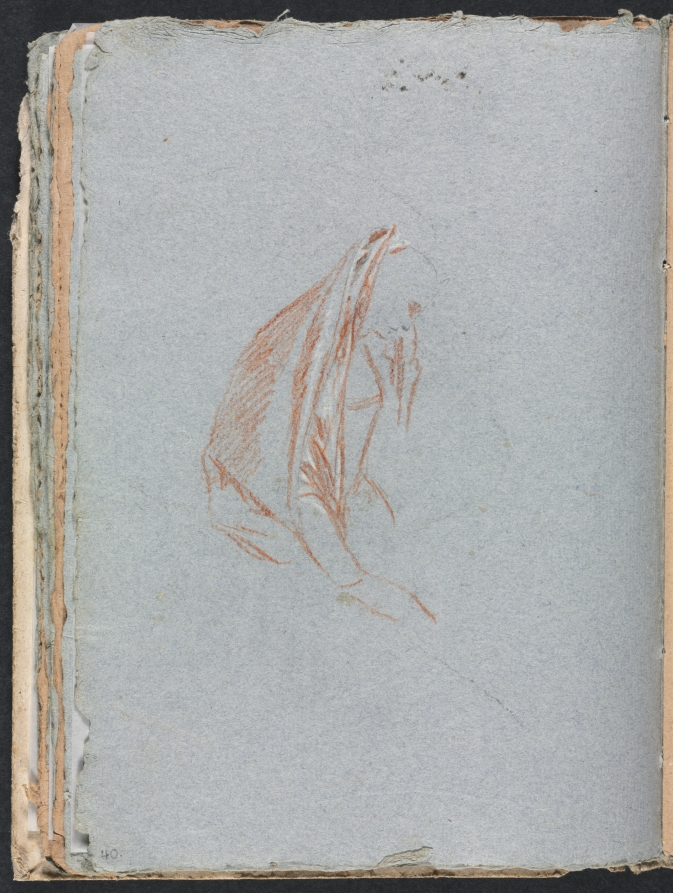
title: Verona Sketchbook: Female figure with cloak (page 40)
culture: Italy, 18th century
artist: Francesco Lorenzi (Italian, 1723–1787)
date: 1760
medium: red chalk with white heightening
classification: Bound Volume